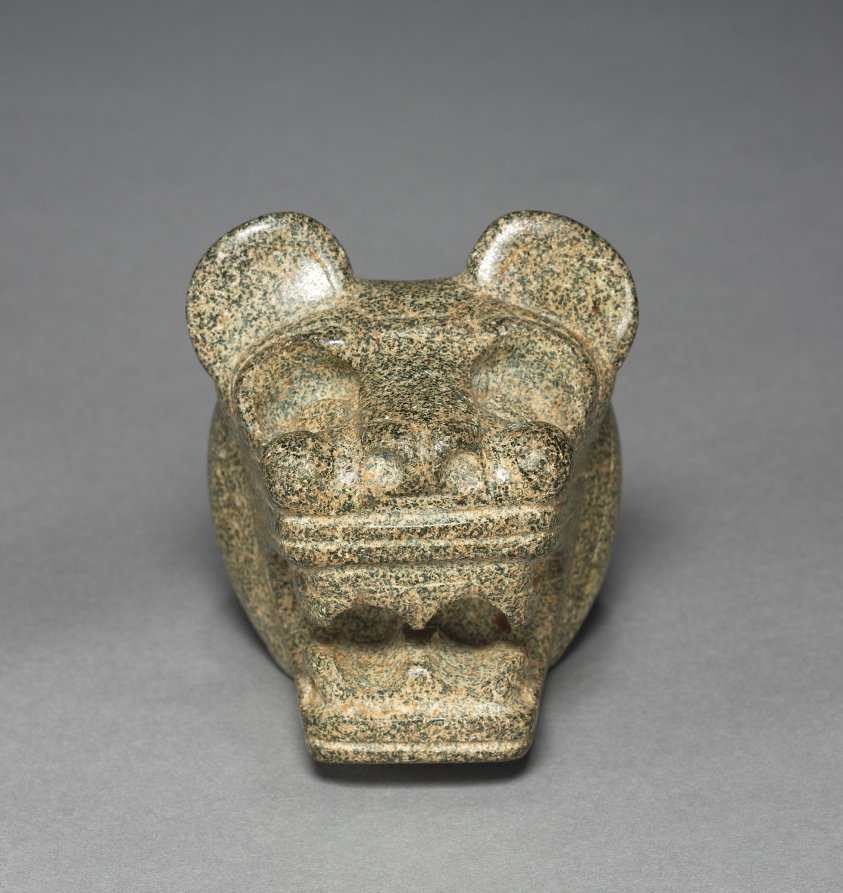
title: Ceremonial Mace (Club) Head: Feline (Jaguar?)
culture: Costa Rica, Southern Nicoya region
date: c. 300 BCE–600 CE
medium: stone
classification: Stone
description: Probably once mounted on wooden shafts, these objects could have served as symbols of chiefly authority, group insignia, the heads of ceremonial weapons, or all three. They eventually were placed in elite graves. The bird may be a male curassow and the feline, a jaguar.